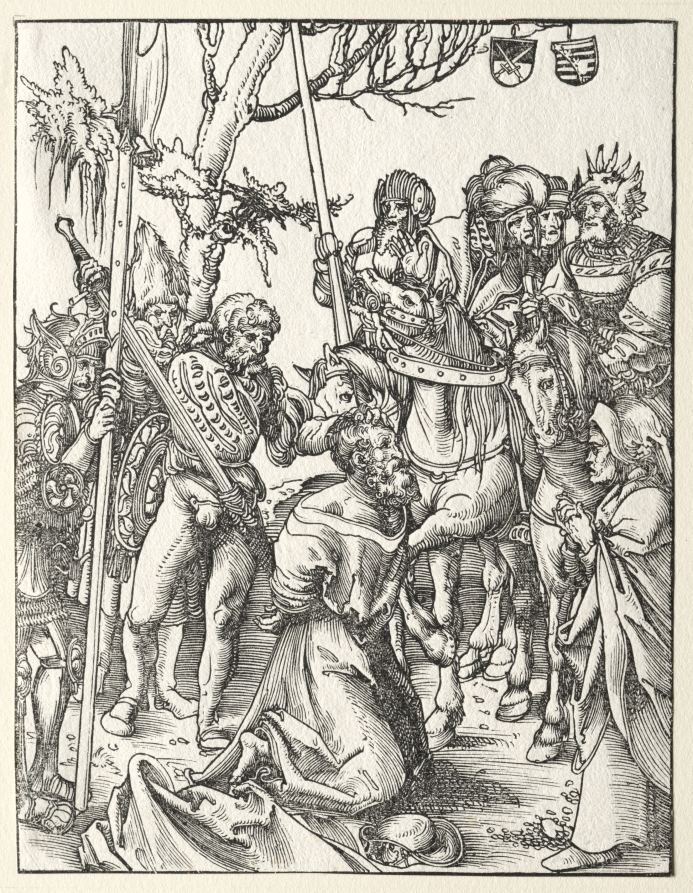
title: Martyrdom of St. James the Greater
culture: Germany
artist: Lucas Cranach (German, 1472–1553)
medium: woodcut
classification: Print